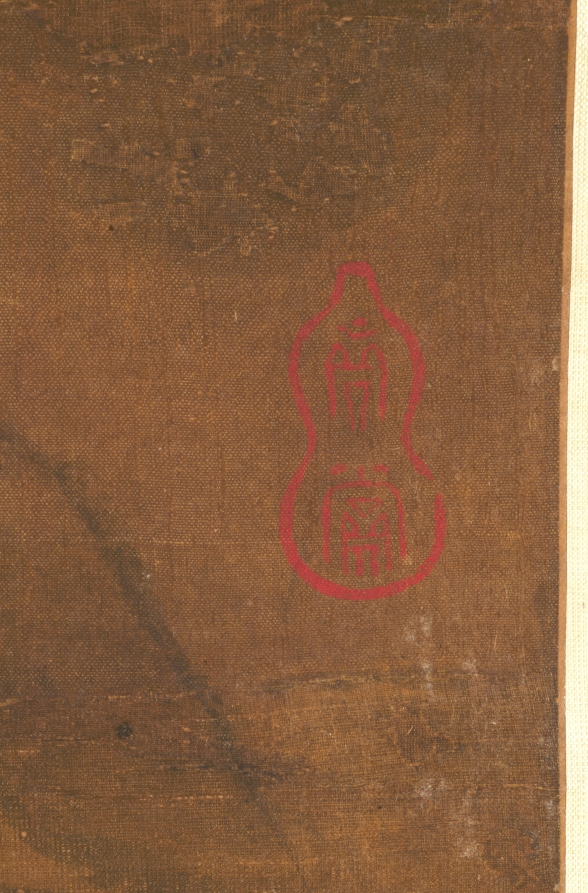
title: Summer Mountains (after Dong Yuan [active c. 937–75])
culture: China, Yuan dynasty (1271-1368)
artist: attributed to Huang Gongwang (Chinese, 1269–1354)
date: 1290–1354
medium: hanging scroll; ink and slight color on silk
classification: Painting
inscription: 【印】一峰道人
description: This monumental landscape is drawn in softly rounded strokes with darker lines frequently applied on top of lighter ones. This technique recalls one of the suggestions included in a collection of the artist's writings known as Secrets of Landscape Painting: The most difficult thing in painting is using the ink. The artist begins by using dilute ink and builds it up to the point where it begins to look right, then uses dense, black ink, applied fairly dry, and washes of deeper-toned ink. This technique distinguishes the fields from the paths, the far from the near. Huang Gongwang may have learned this technique from observing nature through the eyes of an earlier master, Dong Yuan, a painter whose style he shared.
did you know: The wet hills and moist, rich atmosphere evoke the southern Chinese summer, characterized by monsoon rains and lush growth.